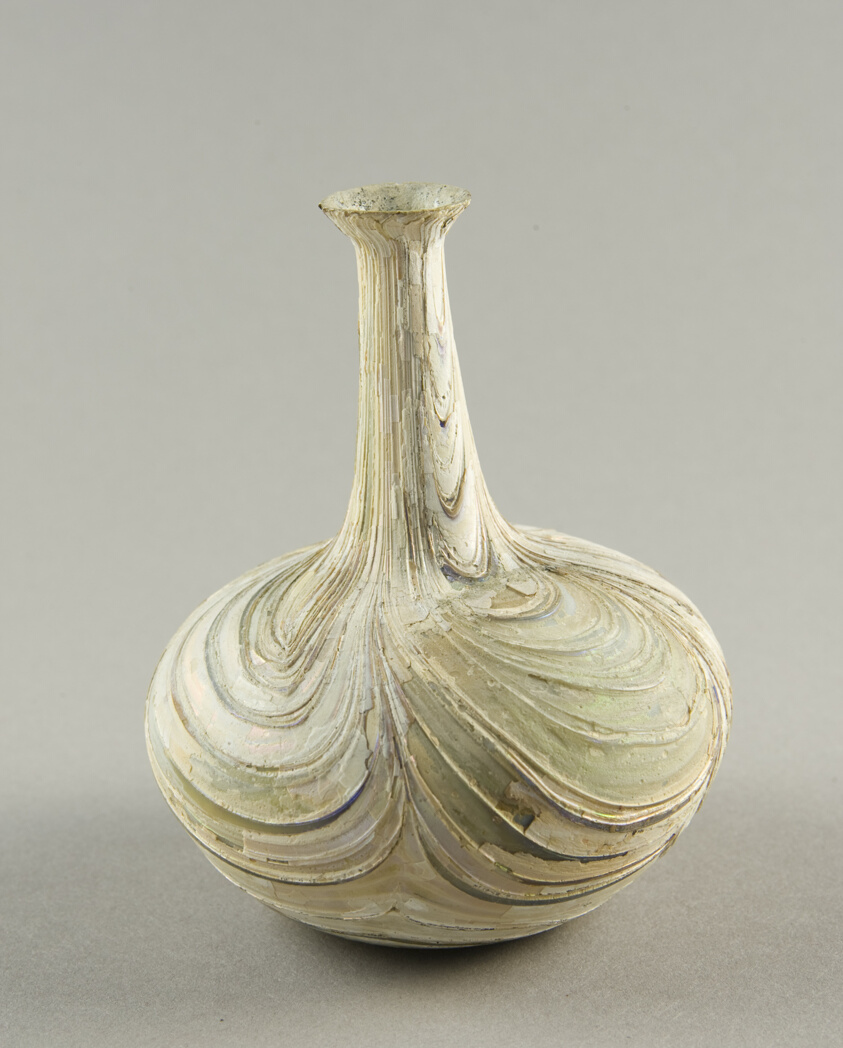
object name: Vessel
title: Bottle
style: syrian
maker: Roman; Levant or Syria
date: 1st century BCE-1st century CE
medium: Glass, blown technique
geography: Syria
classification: bottle; glass; vessel; ancient art